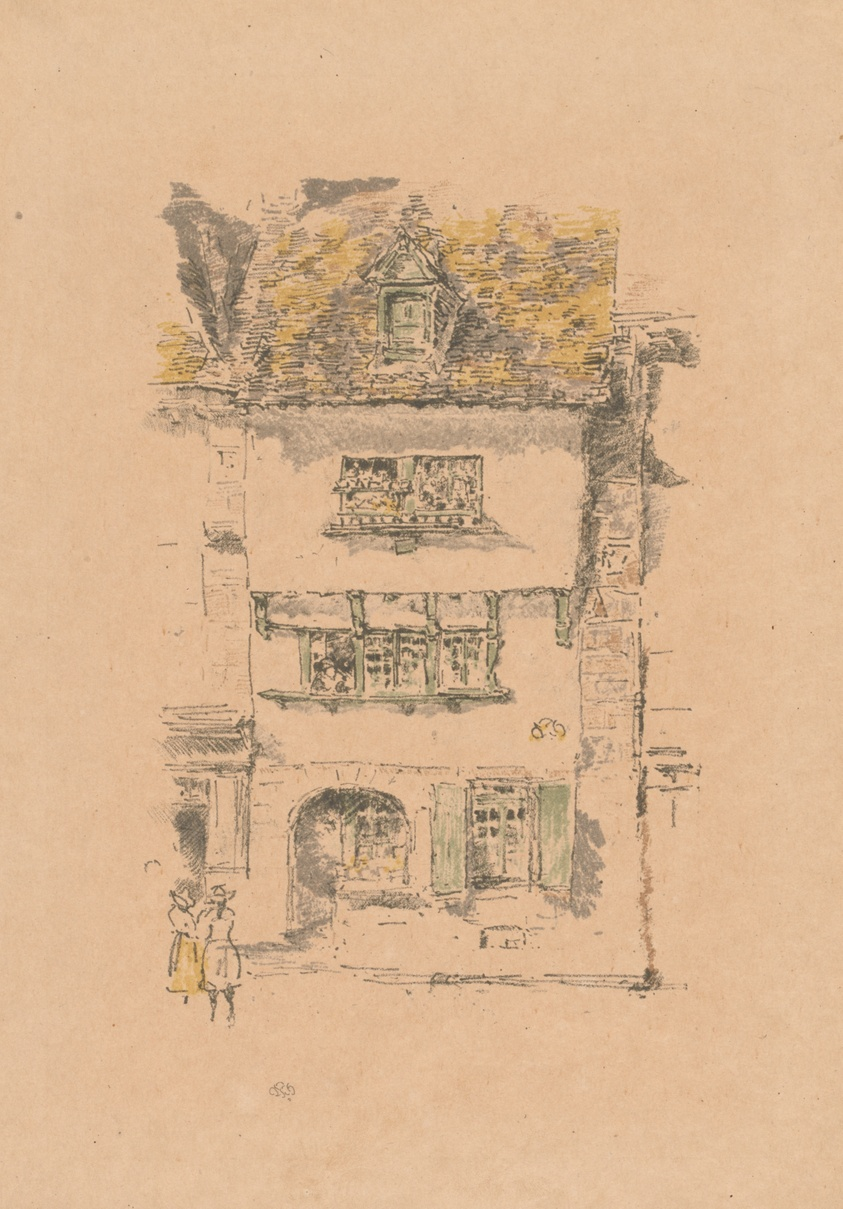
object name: Print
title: Yellow House, Lannion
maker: James McNeill Whistler (American, 1834-1903)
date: 1893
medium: Transfer lithograph from six stones, in black (keystone), greenish gray, brown, green, yellow, and gray, with scraping, on tan wove Japanese vellum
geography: United States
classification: transfer lithograph; lithograph; print; prints and drawing